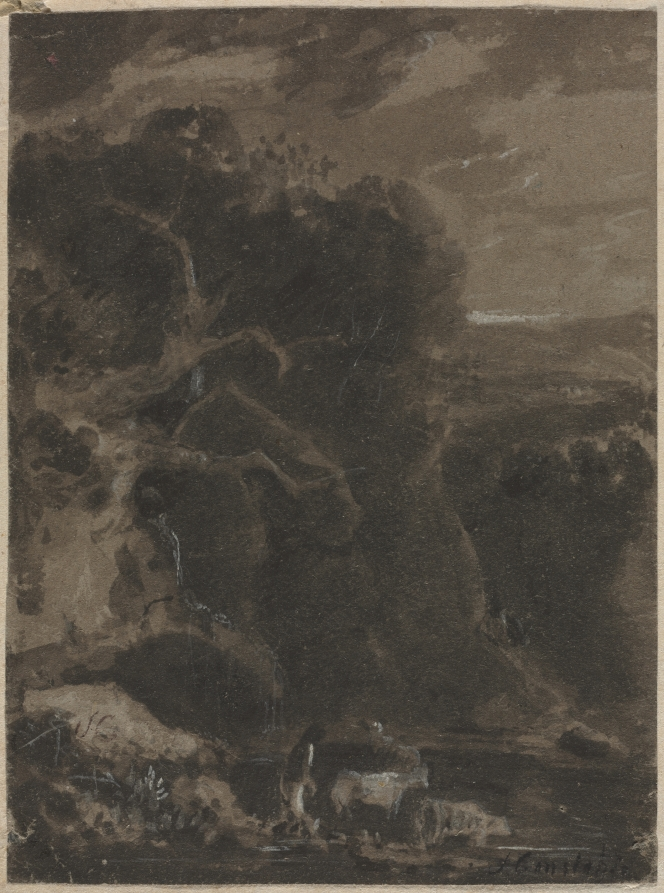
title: The Ford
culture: England, British School, 18th century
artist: Anonymous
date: 1700s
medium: brush and brown ink heightened with white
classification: Drawing